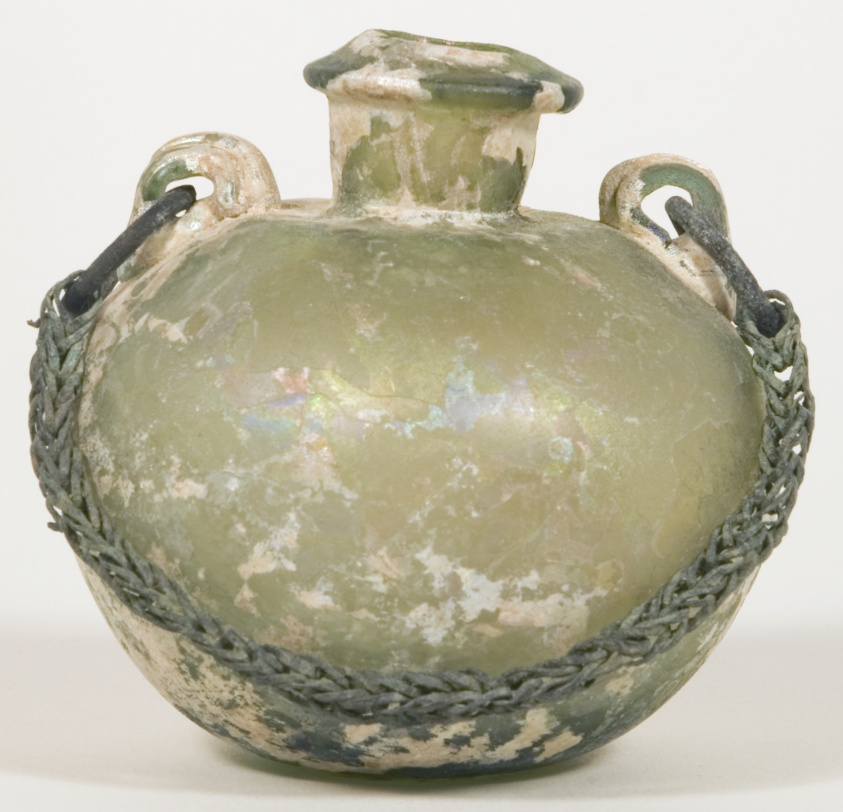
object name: Vessel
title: Aryballos (Container for Oil) with Chain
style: syrian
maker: Roman; Nazareth (now Israel)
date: late 1st-2nd century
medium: Glass, blown technique, and bronze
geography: Syria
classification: container; aryballos; glass; vessel; ancient art